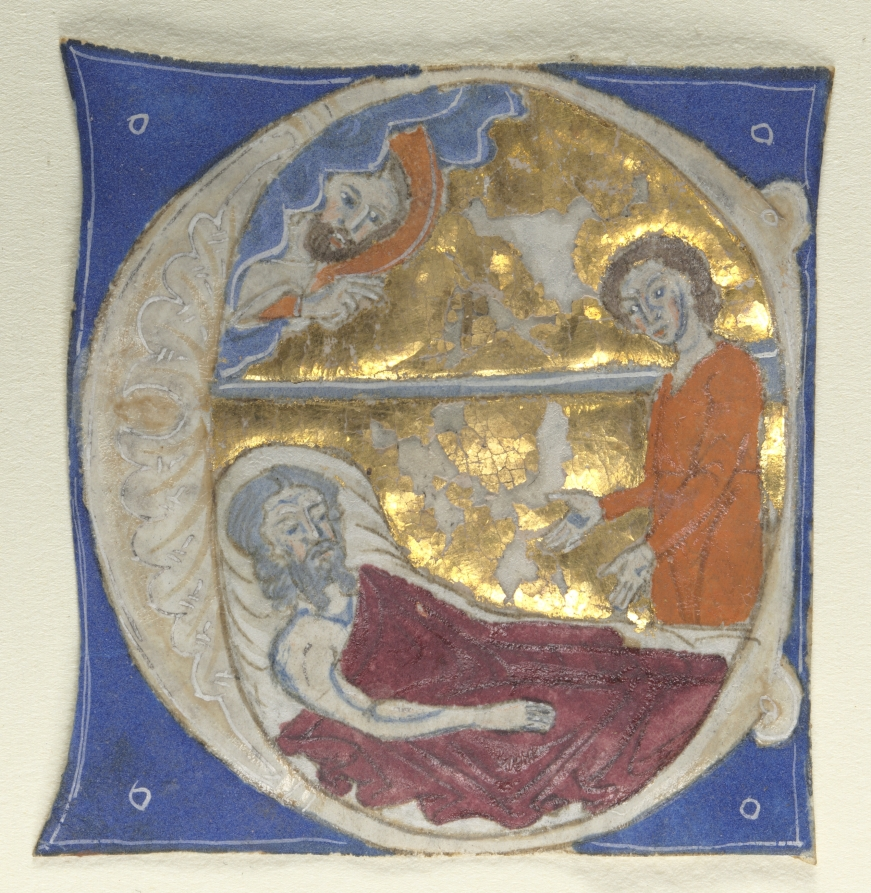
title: Historiated Initial Excised from a Bible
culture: Italy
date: 1200s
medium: tempera and gold on parchment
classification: Manuscript